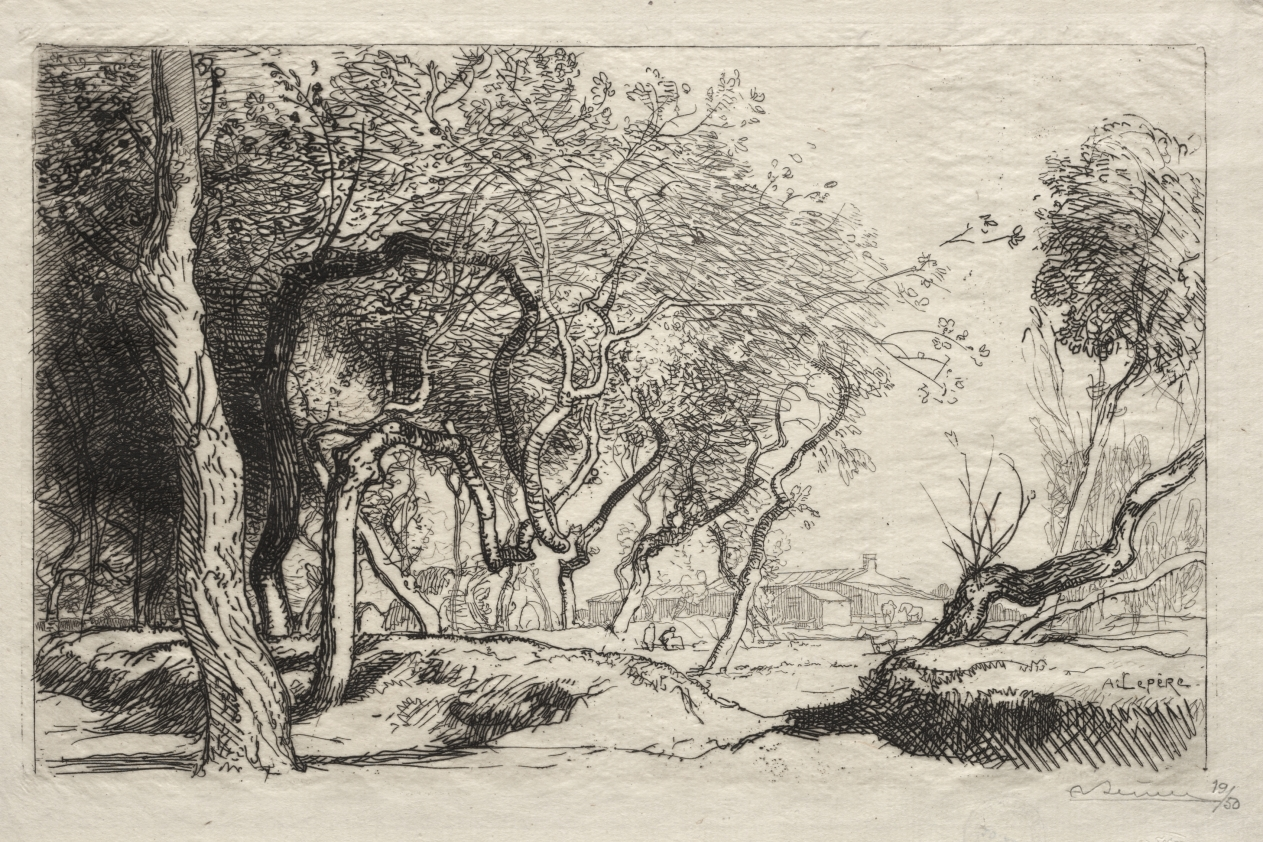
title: The Twisted Tree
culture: France, 20th century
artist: Auguste Louis Lepère (French, 1849–1918)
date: 1915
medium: etching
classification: Print